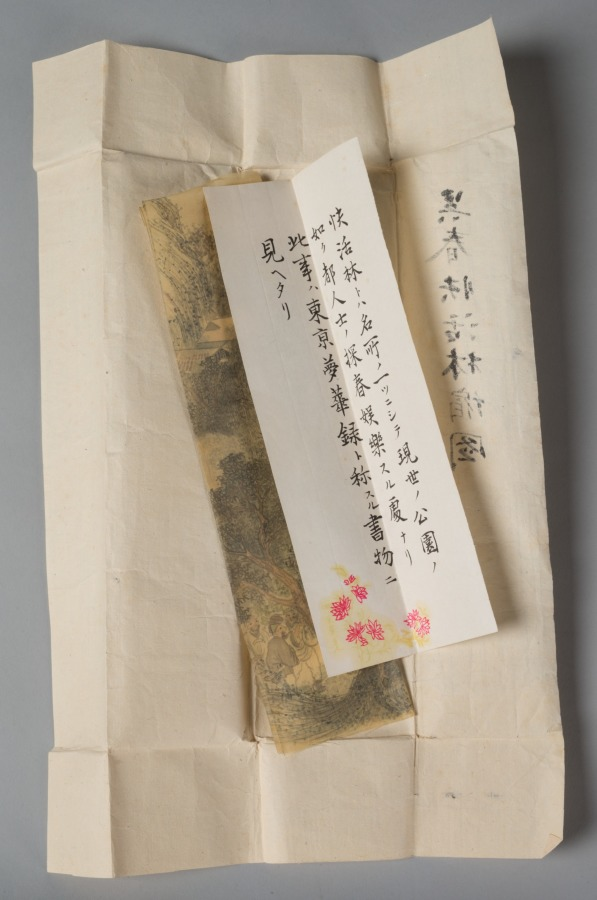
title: Happy Forest, from Water Margin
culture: Japan, Edo period (1615–1868)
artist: Matsumura Goshun (Japanese, 1752–1811)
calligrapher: and Amenomori Shōteki (Japanese, 1731–1786)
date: late 1700s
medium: hanging scroll; ink and color on paper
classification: Painting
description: The Chinese literary classic Water Margin is set in the 1120s and tells the story of 108 outlaws who first rebel against the government and then join forces with it. This painting depicts an episode in which hero Wu Song reclaims the tavern Happy Forest for its rightful owner, the prison warden’s son, Shi En. To prepare for the fight, Wu Song drinks a lot of wine. The painting was inscribed with a quote in which an ally describes Wu Song’s fighting style. It reads as follows: Where his twin fists rise, clouds and thunder roar, When his flying kick comes, wind and rain tremble.